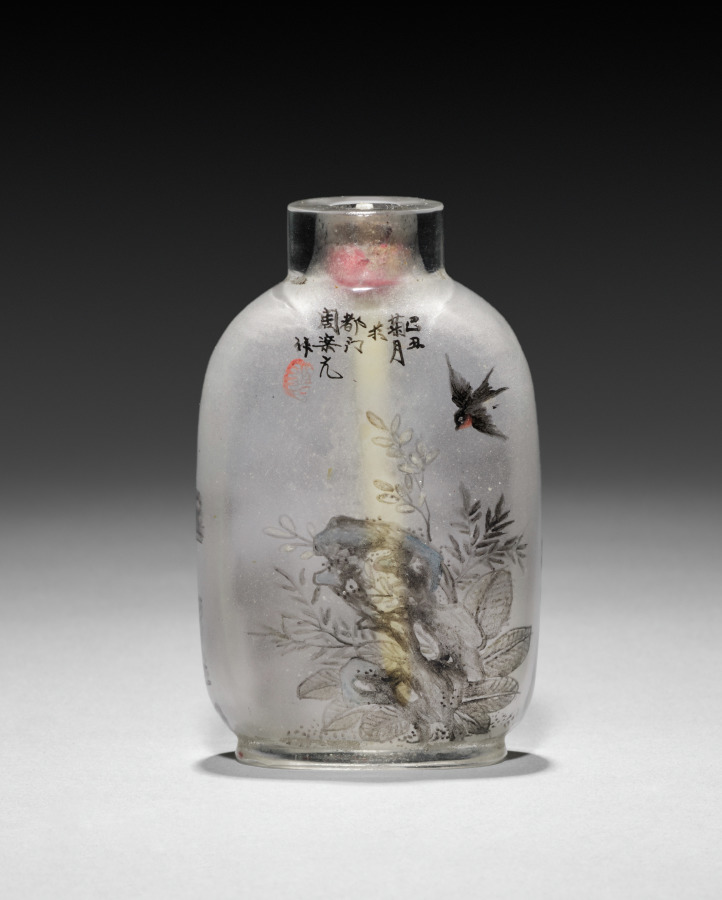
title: Snuff Bottle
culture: China, Qing dynasty (1644-1911)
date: 1644–1911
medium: glass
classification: Glass